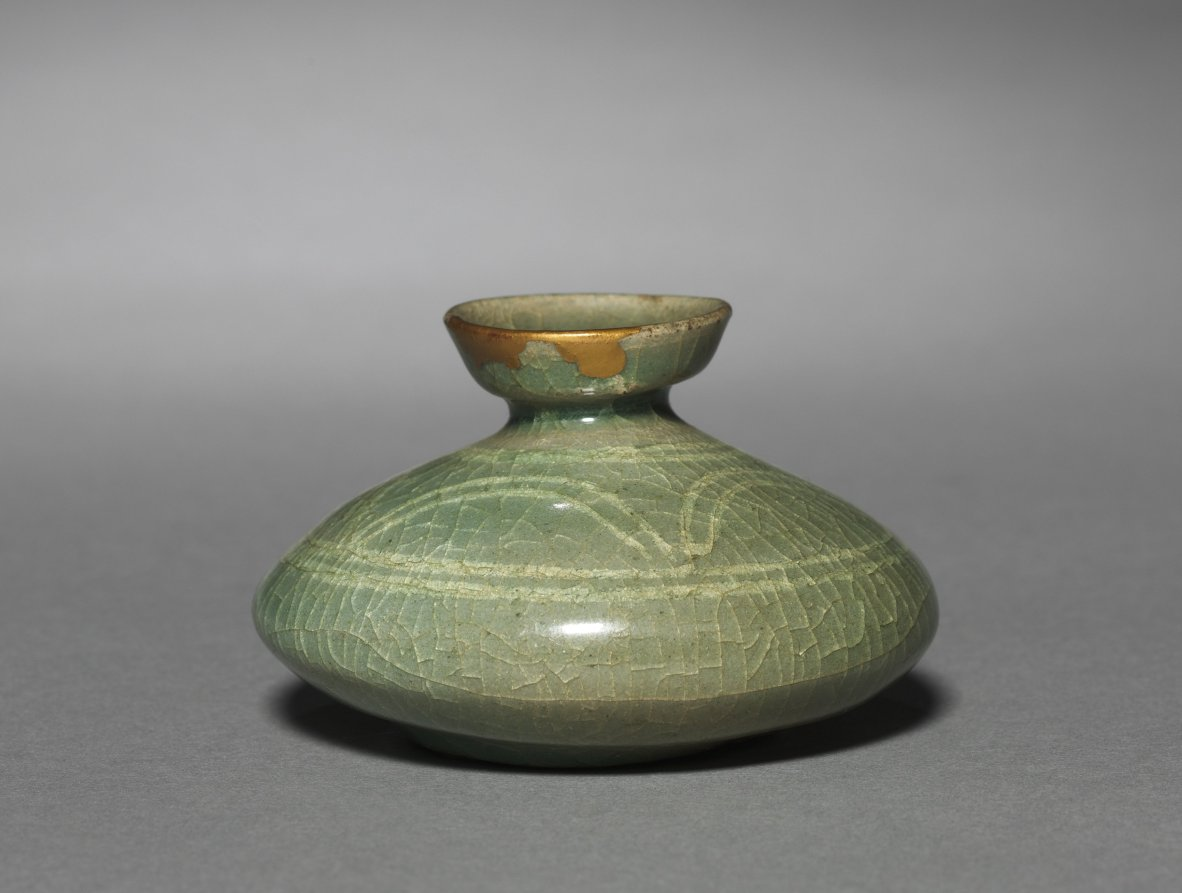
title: Oil Bottle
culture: Korea, Goryeo dynasty (918–1392)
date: 1200s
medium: painted celadon (Mishima ware)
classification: Ceramic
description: Celadons, spoons, seals, and bronze mirrors were the most common burial objects in tombs during the Goryeo period (918–1392). Once used to contain oil treatment for hair, this little celadon bottle was one of the standard goods that furnished elites' tombs.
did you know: This bottle was used to contain oil treatment for hair.